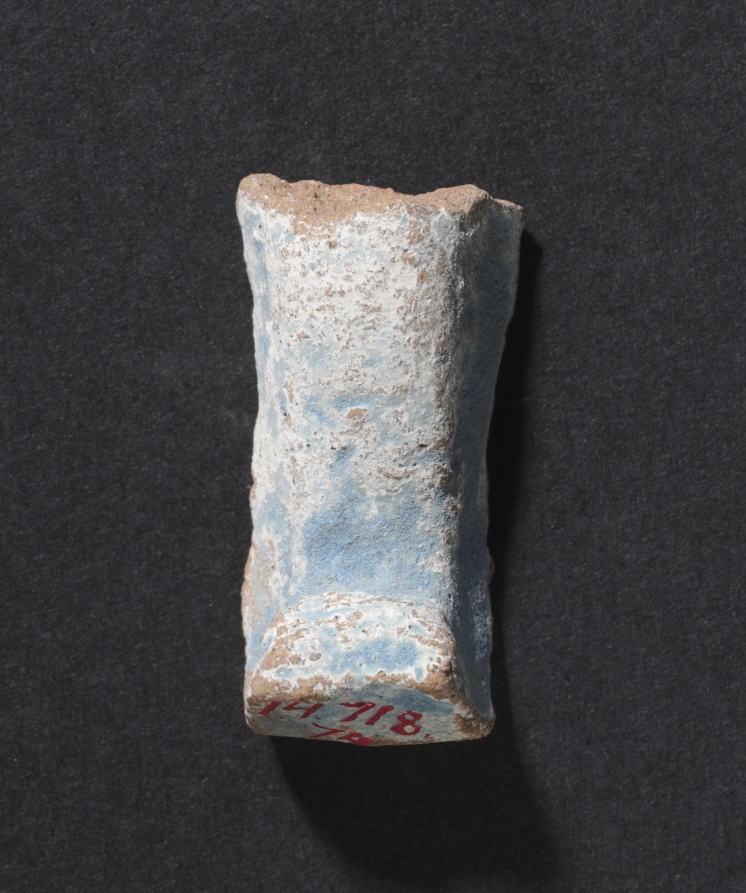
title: Shawabty of Ditamenpaankh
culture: Egypt, Late period (715–332 BCE), Dynasty 25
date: 715–656 BCE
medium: terracotta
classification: Funerary Equipment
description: High demand for shawabtys in the Late Period, a time when as many as 400 or more shawabtys were placed in the tomb with the deceased, gave rise to a specialized container for storing them: the shawabty box. This example is inscribed for the lady of the house, Ditamenpaankh, and was probably one of a pair originally made for her. The single-masted boat on the box's lid is perhaps an allusion to the pilgrimage of the deceased to the holy city of Abydos, the cult city of Osiris, king of the dead. The shawabtys inside are crude, mass-produced examples cast in an open mold. Made of terracotta, their blue paint imitates more costly shawabtys made of faience. As for the shawabty spell, it has been removed from its traditional location on the shawabty's front and relocated onto the sides of box, where it needed only to be written once, thus expediting production.